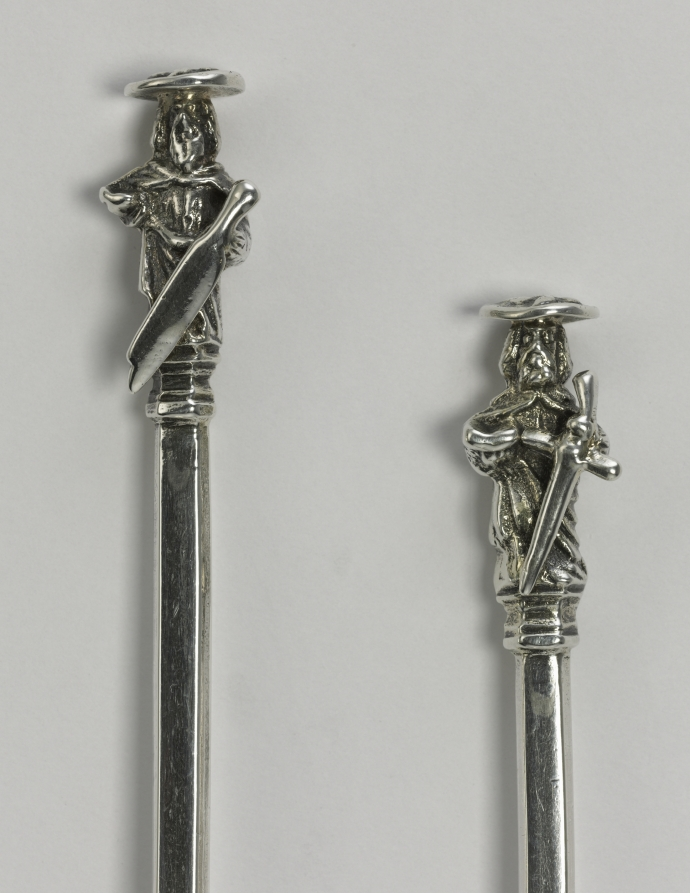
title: Saint Bartholomew Spoon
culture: England, London, 17th century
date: 1622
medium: silver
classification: Silver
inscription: pricked on back of bowl: "R H."